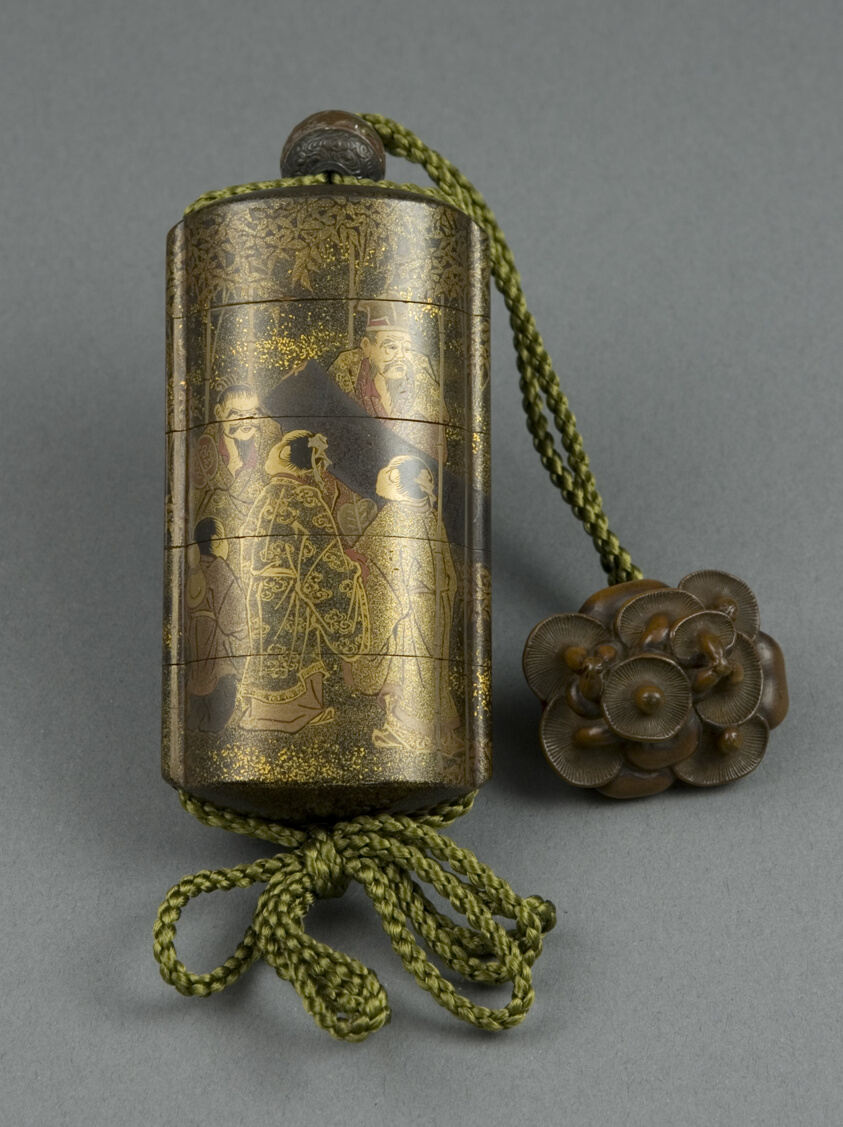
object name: Decorative Arts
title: Inro Case Depicting the Seven Sages of the Bamboo Grove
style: Japanese (culture or style)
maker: Chikanao; Japanese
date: 18th century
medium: Lacquer with inlay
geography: Japan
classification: lacquer; inro; asian art; decorative arts